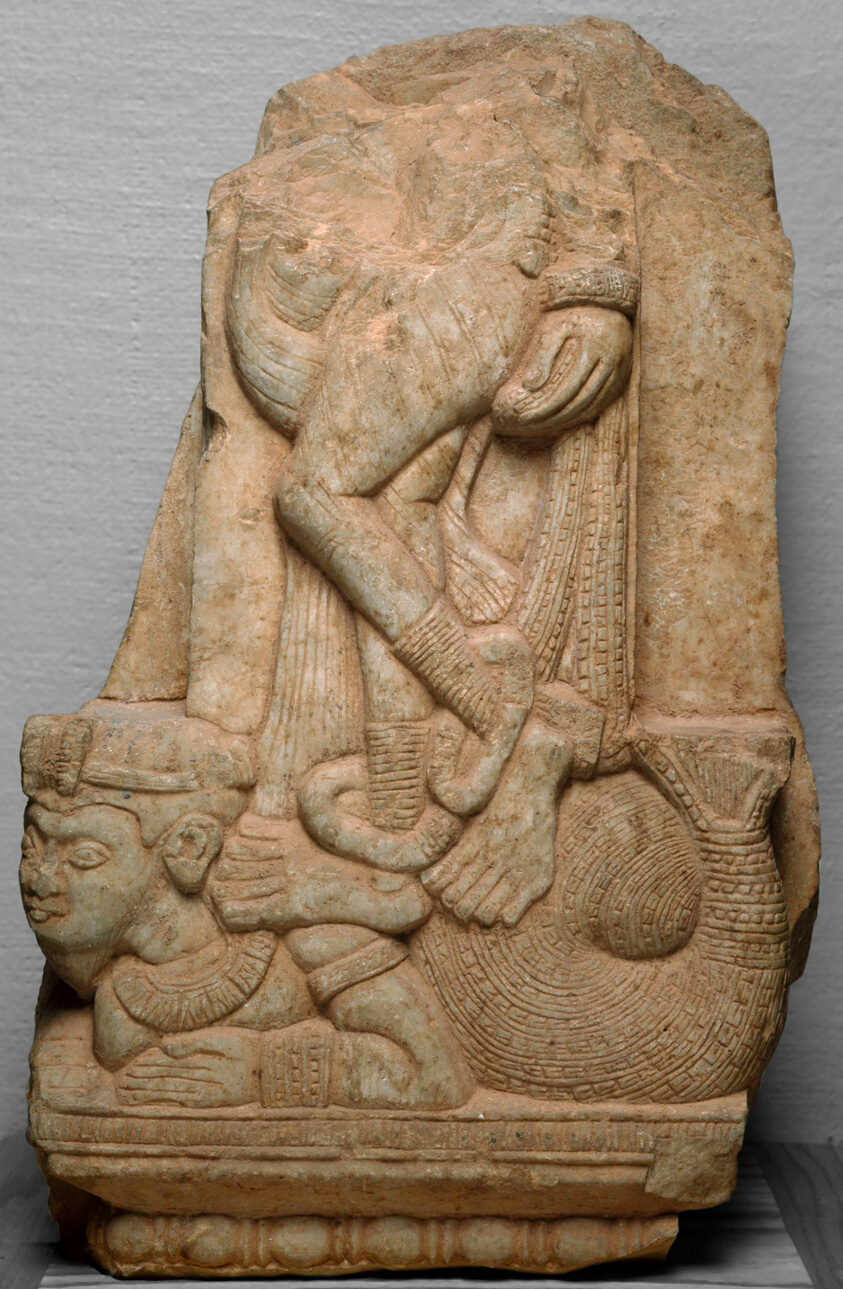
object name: Architectural fragment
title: Yakshi Standing on a Fishtailed Mythical Beast (Makara)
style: South Asian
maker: India; Andhra Pradesh, possibly Nagarjunakonda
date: 2nd century B.C./2nd century A.D.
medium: Limestone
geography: Andhra Pradesh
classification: stone; sculpture; asian art; architectural fragment